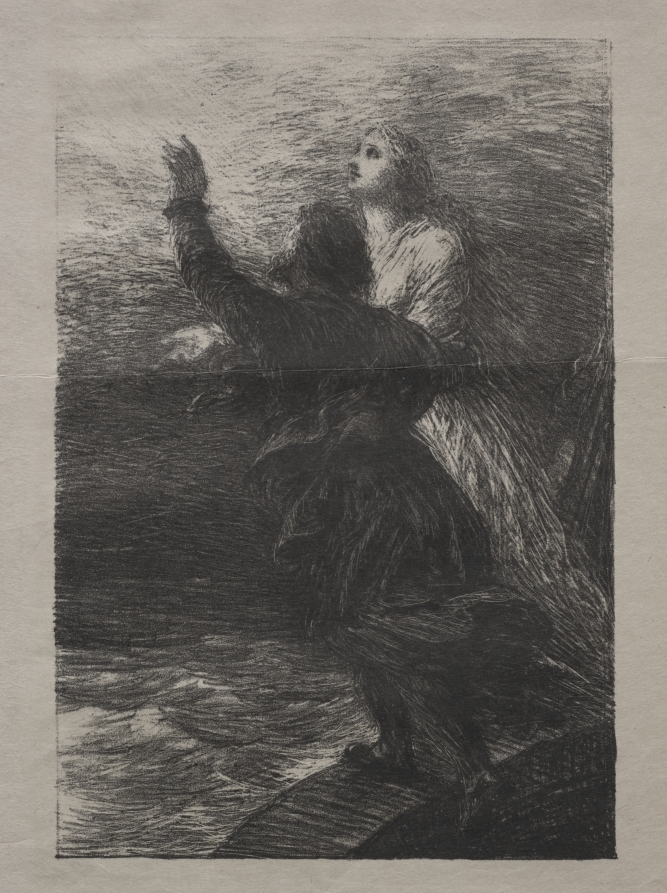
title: The Flying Dutchman: Act III, The Ecstasy of Senta and the Dutchman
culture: France, 19th century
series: Richard Wagner: His Life and Work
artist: Henri Fantin-Latour (French, 1836–1904)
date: 1886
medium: lithograph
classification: Print